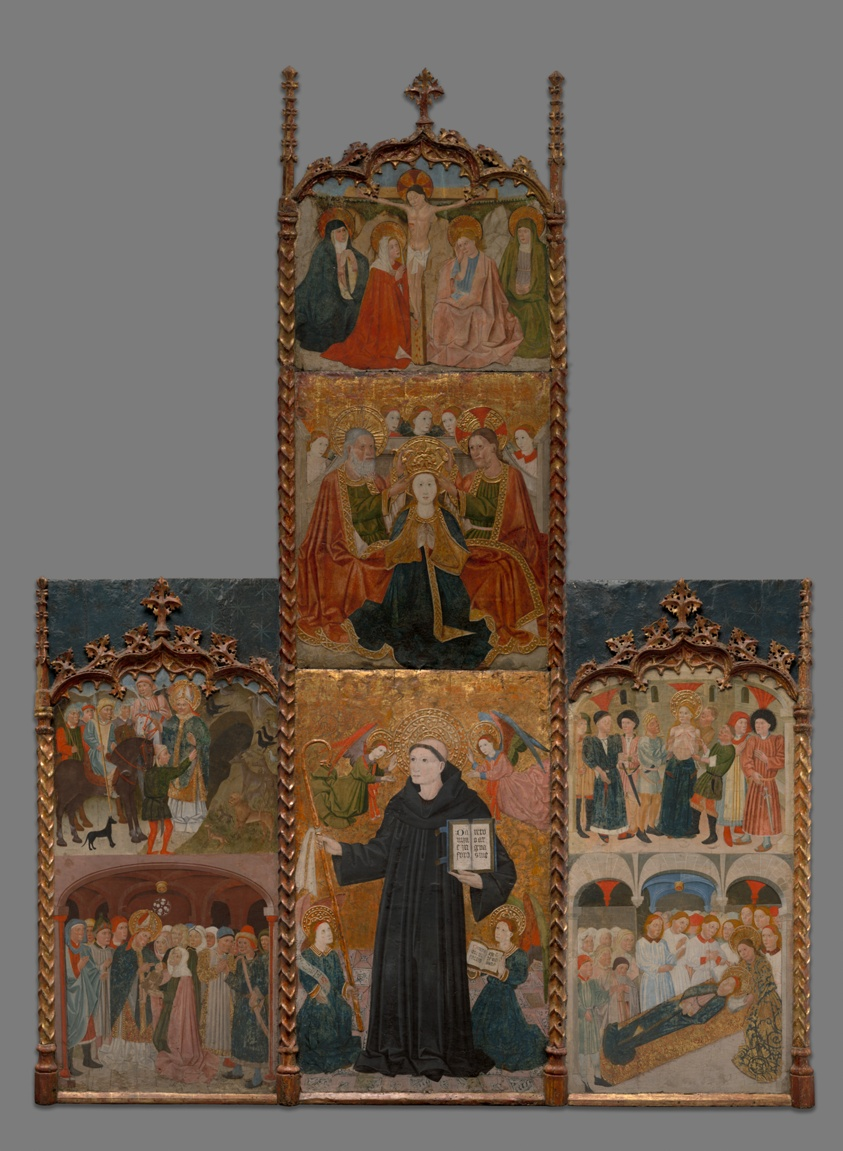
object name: Painting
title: Retable of Saints Athanasius, Blaise, and Agatha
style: 15th century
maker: Master of Riglos (Spanish, active c. 1435–1460)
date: 1440/45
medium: Tempera on panel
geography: Spain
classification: painting; spanish; altar; altarpiece; paint; tempera; european painting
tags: saints, women, weapons, Virgin Mary, violence, swords, staffs, spears, religious scenes, religious figures, religious attire, religious, religion, red (color), prayer, people, Mourning, men, martyrs, Jesus, interior, horses, horse, gold (color), funerals, figures, dogs, dog, Devotion, death, crucifixions, crowns, cross, coronations, Christianity, Christian subjects, children, cave, book, black (color), birds, bird, biblical, bibles, babies, animals, angels, altar